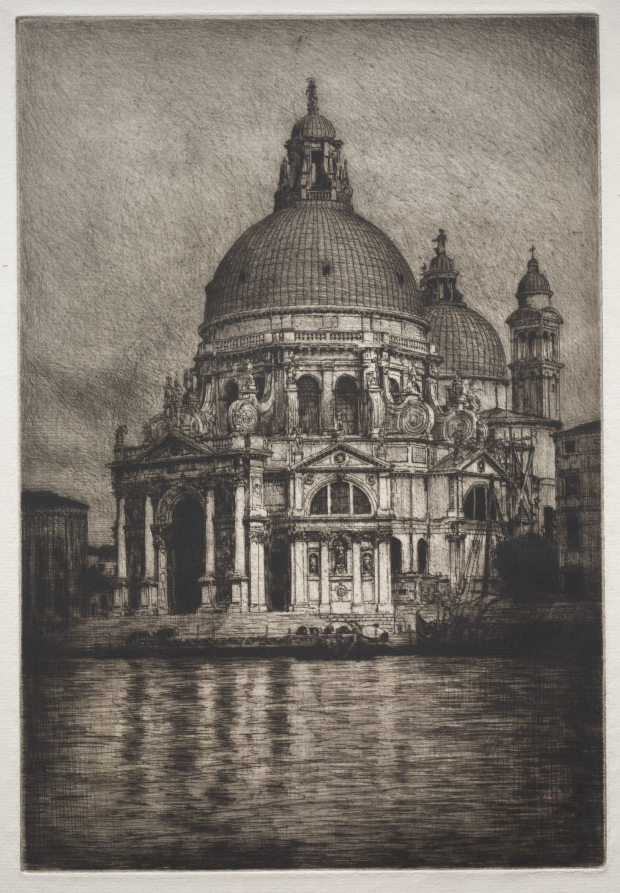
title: Santa Maria Della Salute #2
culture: England, 19th century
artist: Mortimer Menpes (British, 1860–1938)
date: 1910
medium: etching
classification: Print